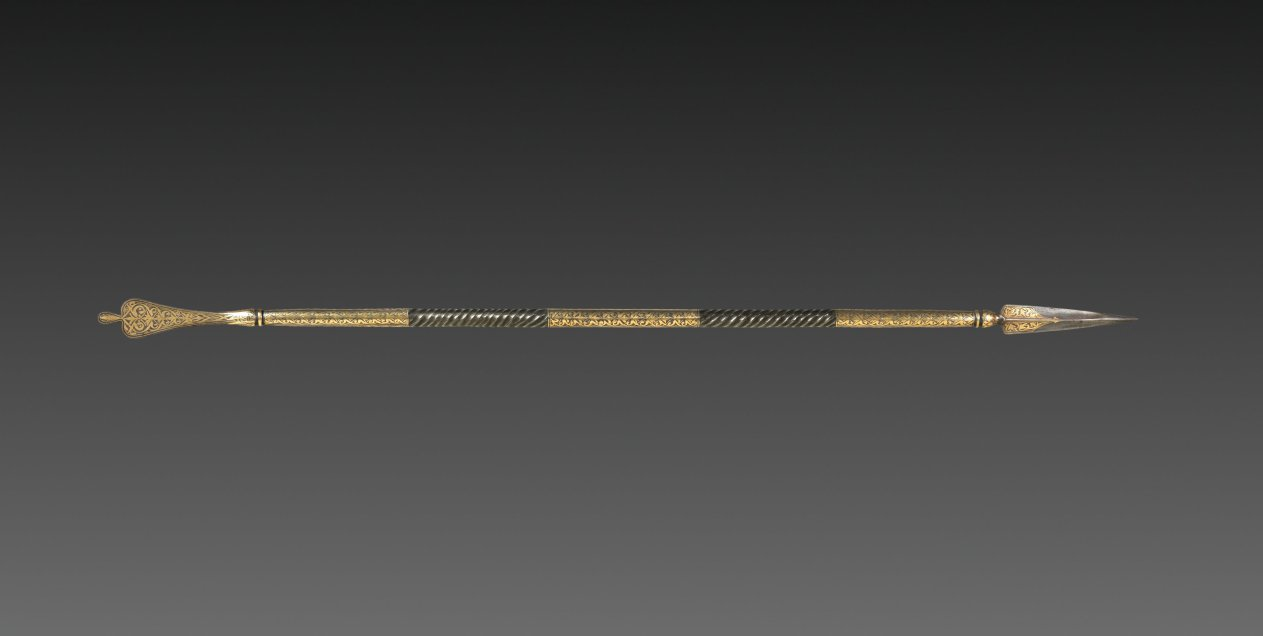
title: Javelin with Concealed Poignard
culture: Iran (?), 19th century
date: 19th Century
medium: steel inlaid with gold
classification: Arms and Armor